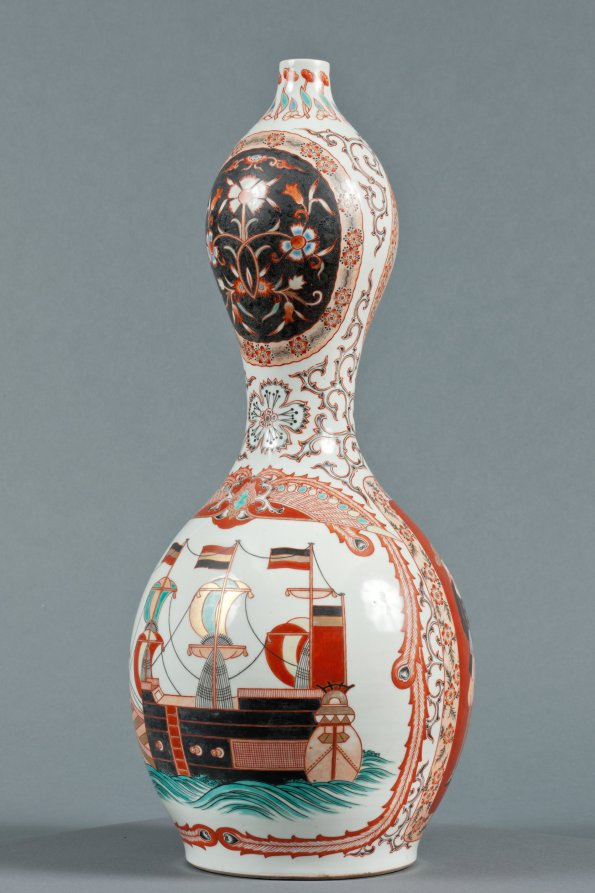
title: Bottle with Western Ships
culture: Japan, Edo period (1615–1868)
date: c. 1800–1868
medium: Porcelain with decoration in colored enamels and underglaze blue, overglaze enamels, and gold (Hizen ware, Arita type)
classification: Ceramic